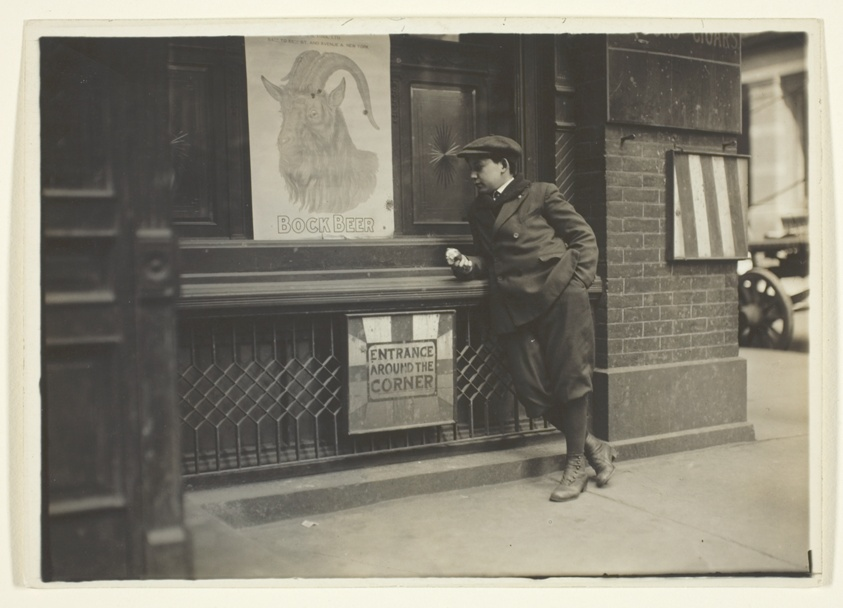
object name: Photograph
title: Untitled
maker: Lewis Wickes Hine (American, 1874–1940)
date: c. 1910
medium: Gelatin silver print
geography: United States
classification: gelatin silver (developing-out-paper) pr; photographic process; photography; photograph